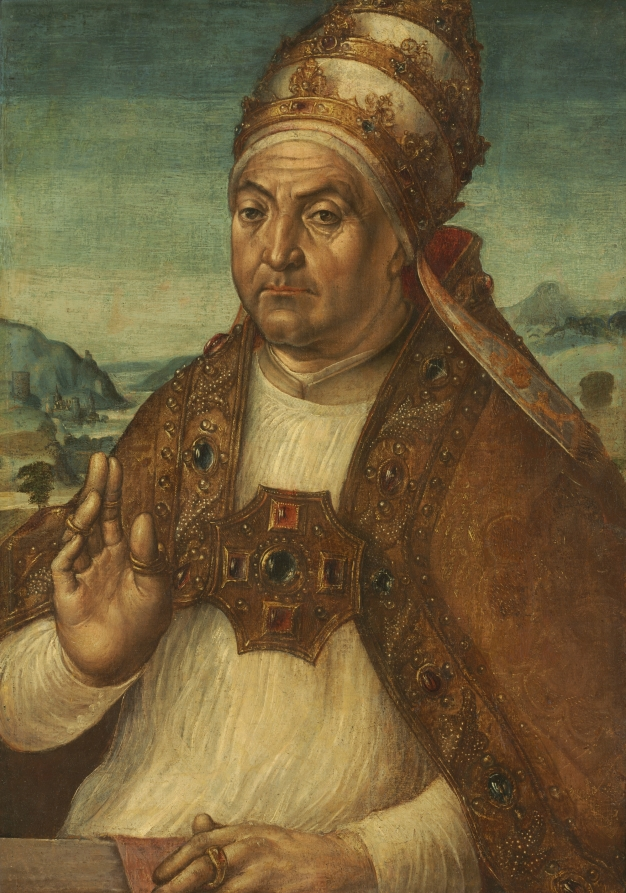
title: Portrait of Pope Sixtus IV della Rovere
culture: Spain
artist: Pedro Berruguete (Castilian, c. 1445/1450-1503)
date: c. 1476–82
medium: oil on wood, transferred to canvas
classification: Painting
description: Spanish artist Pedro Berruguete spent a decade in Italy in the 1470s and 1480s, including a period in Rome during which he painted Pope Sixtus IV della Rovere from life. Here, the pope raises his hand in a gesture of benediction, blessing the viewer while meeting their gaze. Using white highlights to represent the glittering luminosity of the bejeweled garments, Berruguete accentuates Sixtus IV’s sumptuous attire, including the triregnum, or ceremonial triple crown and symbol of the papacy.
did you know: James Jackson Jarves (1818–1888)—famed art critic and one of the first Americans to amass a collection of medieval, Renaissance, Mannerist, and Baroque paintings from Italy—owned this painting in the late 19th century.